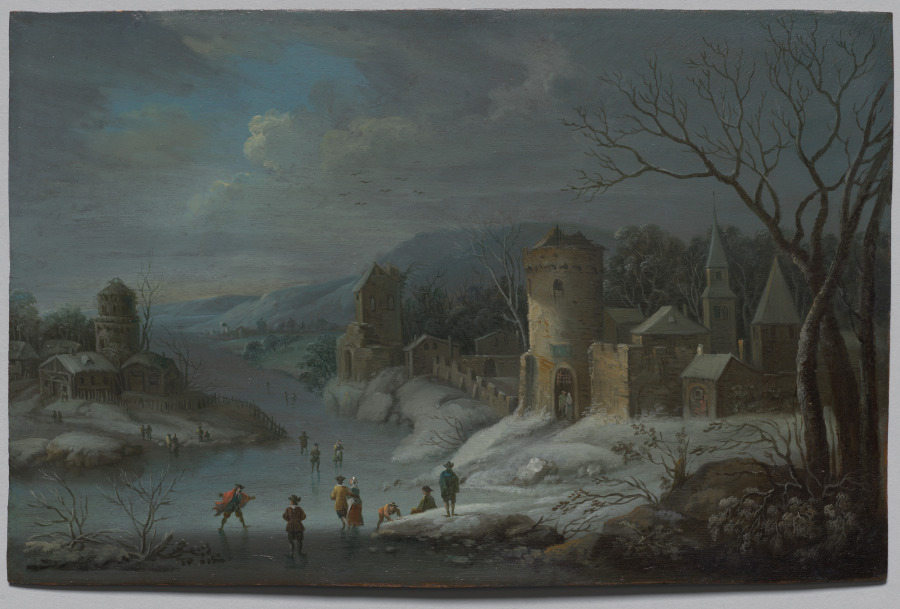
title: Winter Landscape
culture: Netherlands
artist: attributed to Jan Griffier (Dutch, 1648–1718)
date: c. 1680–1718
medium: oil on copper, mounted on wood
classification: Painting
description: A number of scholars have questioned the attribution because Griffier did not generally paint on copper and primarily painted hunting scenes. It may be based on a print, although the source has yet to be identified.